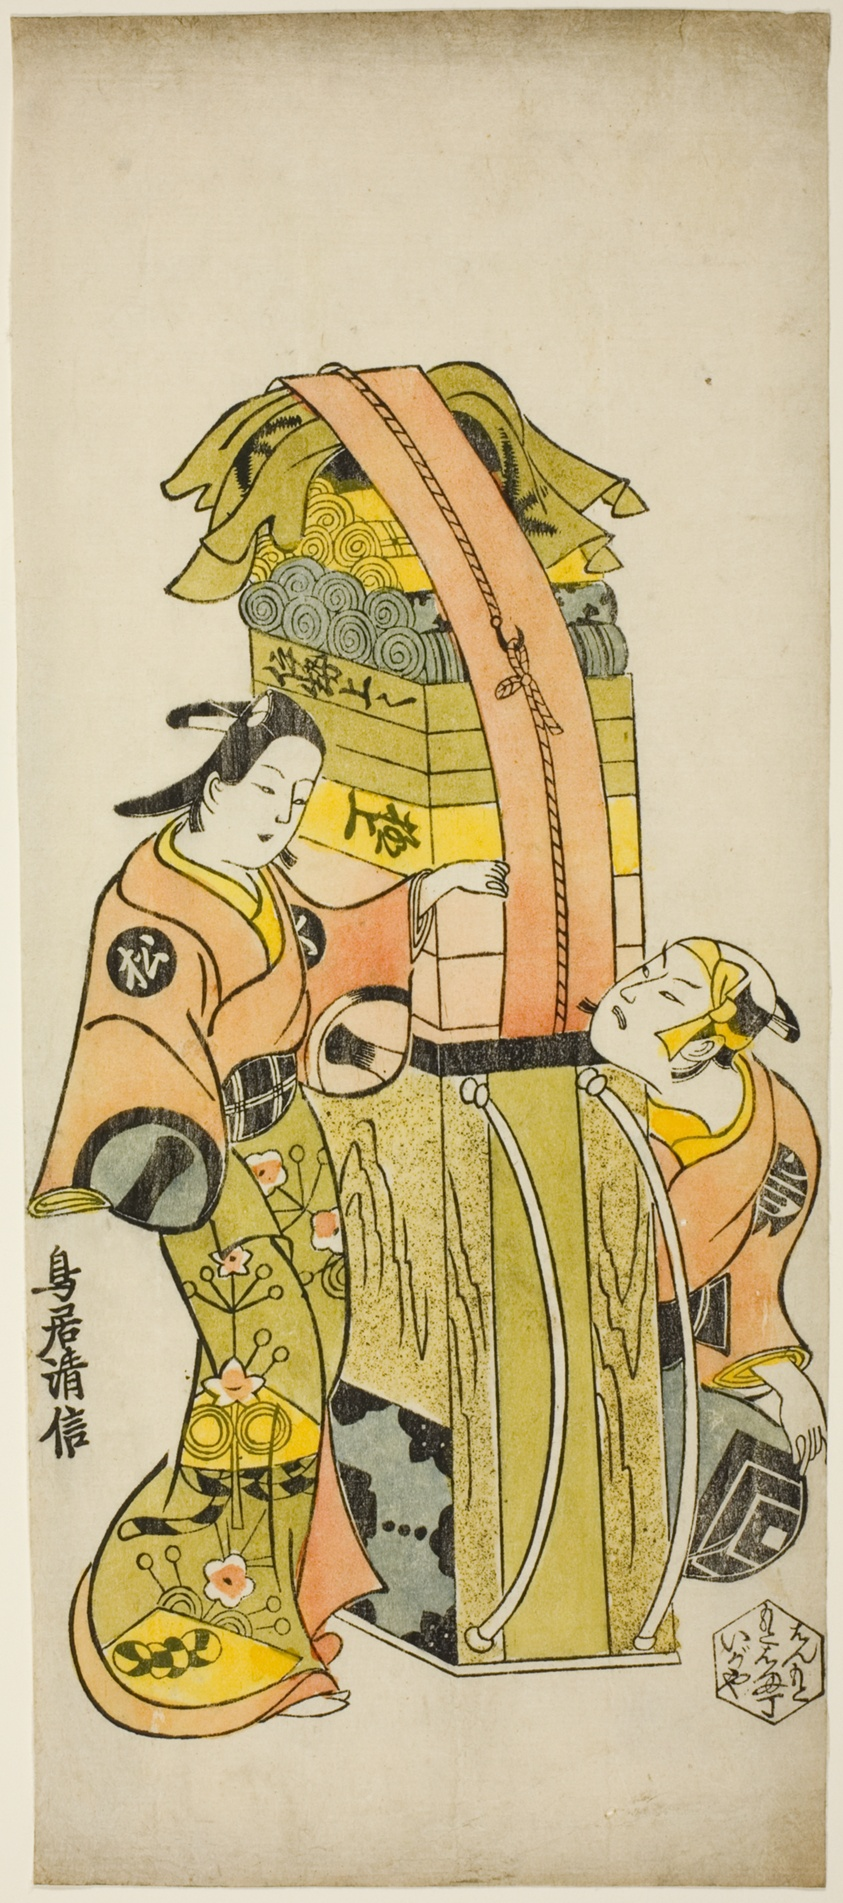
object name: Print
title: The Actors Ichikawa Danjuro II as Kamada Matahachi and Ichikawa Monnosuke I as Hisamatsu in the play "Osome Hisamatsu Shinju Tamoto no Shirashibori," performed at the Morita Theater, 1720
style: Japanese (culture or style)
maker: Torii Kiyonobu I (Japanese, 1664–1729)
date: 1720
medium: Hand-colored woodblock print; hosoban, urushi-e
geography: Japan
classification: woodblock print; print; asian art